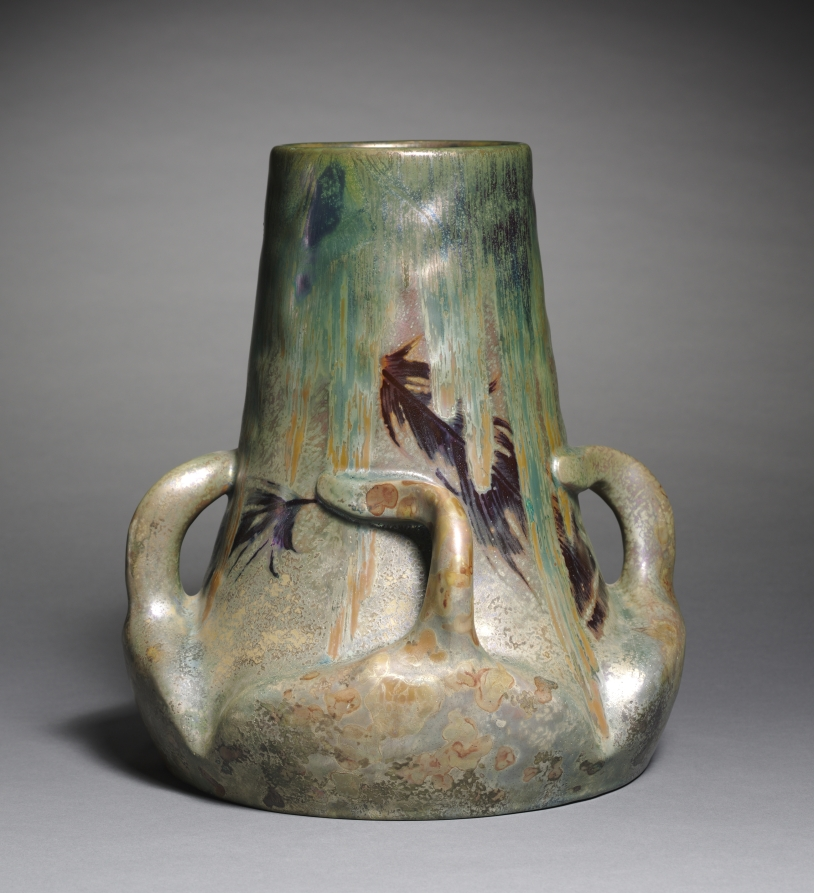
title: Vase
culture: France, Golfe-Juan, 19th century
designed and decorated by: Lucien Lévy-Dhurmer (French, 1865–1953)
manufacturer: Factory of Clément Massier (French)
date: c. 1890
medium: earthenware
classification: Ceramic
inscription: painted on bottom: "Clement Massier / Golfe Juan / LLevy."